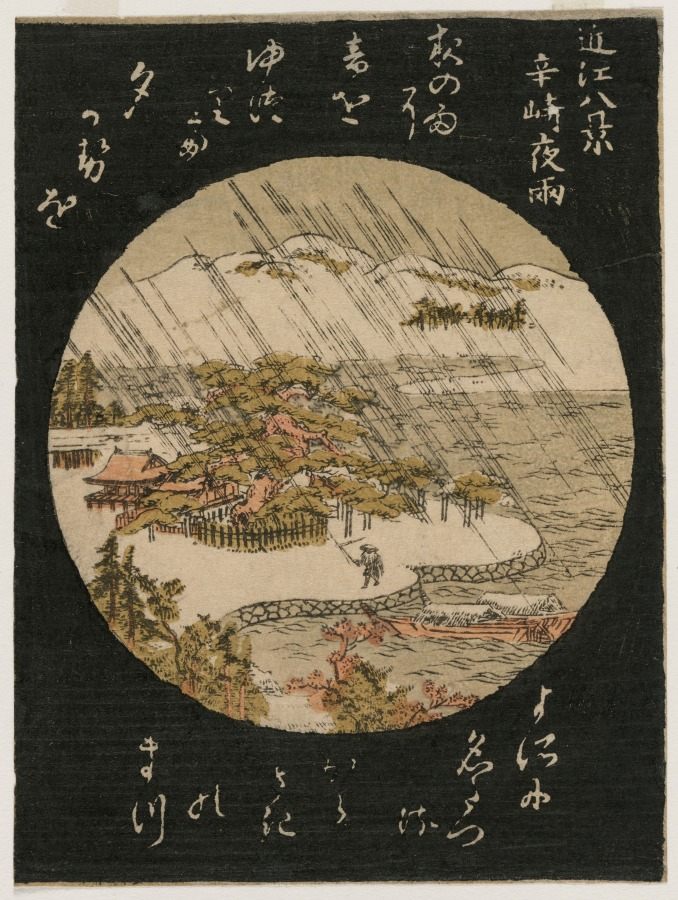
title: Night Rain on the Karasaki Pine from the series Eight Views of Ōmi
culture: Japan, Edo period (1615–1868)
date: 1770s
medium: color woodblock print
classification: Print